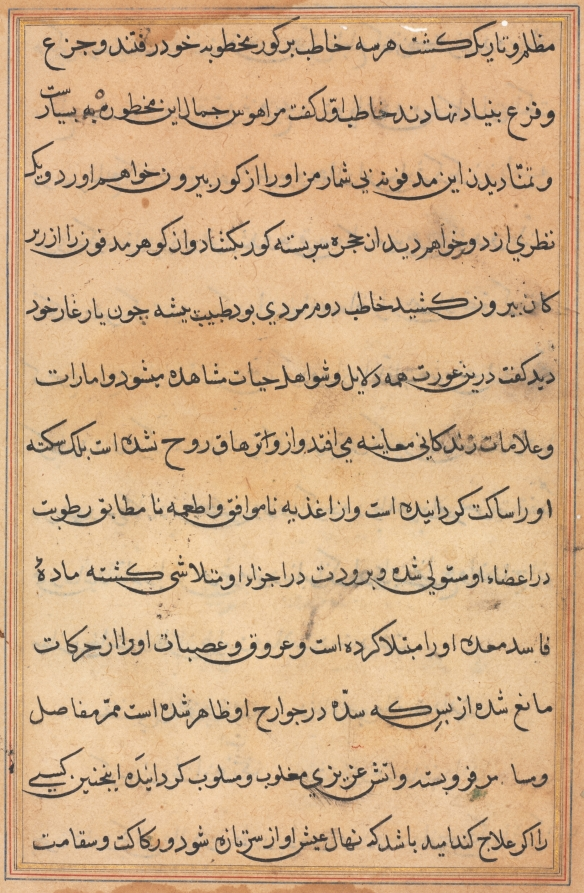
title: Page from Tales of a Parrot (Tuti-nama): text page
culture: Mughal India, court of Akbar (reigned 1556–1605)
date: c. 1560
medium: gum tempera, ink, and gold on paper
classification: Painting